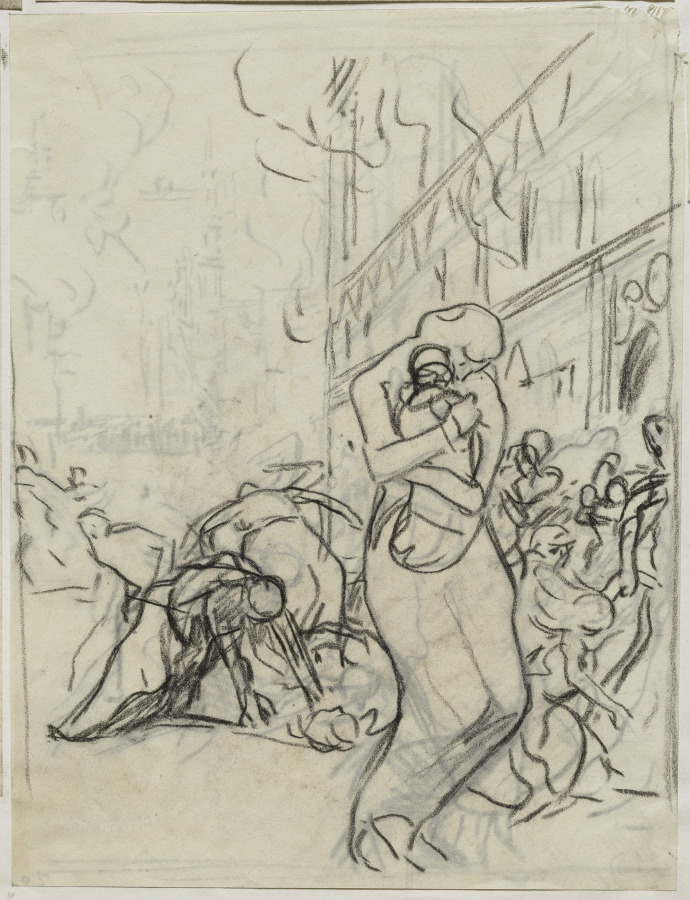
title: L'Incendie de Louvain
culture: France, 20th century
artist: Auguste Louis Lepère (French, 1849–1918)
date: 1914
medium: pen and brush and black ink with white highlights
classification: Drawing